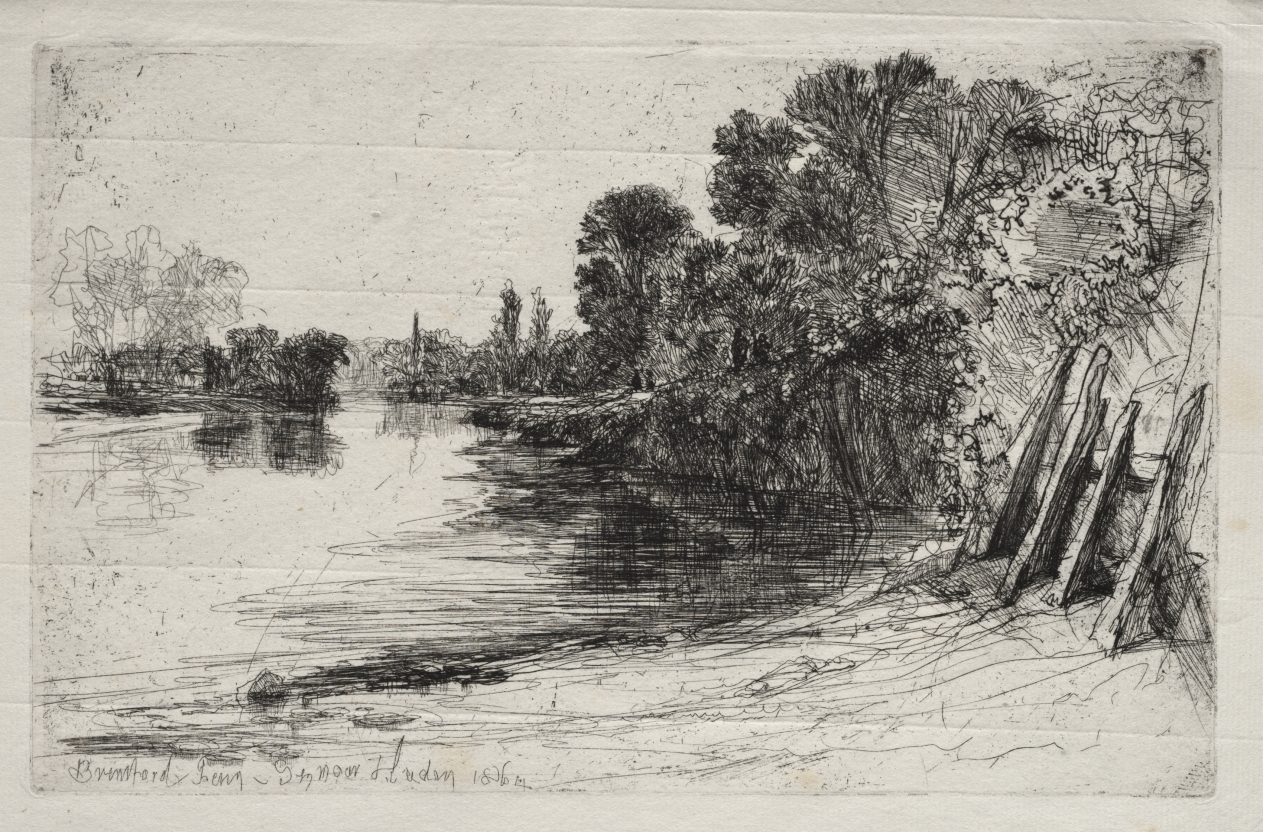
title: Brentford Ferry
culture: England, 19th century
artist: Francis Seymour Haden (British, 1818–1910)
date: 1864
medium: etching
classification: Print